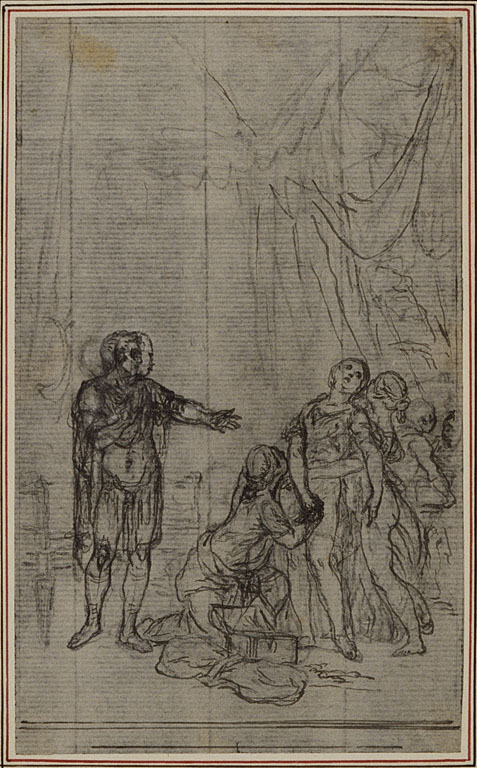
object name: Drawing and Watercolor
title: Study for Lucain's "La Pharsale", Canto V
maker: Hubert François Gravelot (French, 1699-1773)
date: c. 1766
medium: Pen and black ink, with graphite, on gray laid paper, incised for transfer, and perimeter mounted on ivory laid paper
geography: France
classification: pen and ink drawings; drawings (visual works); prints and drawing